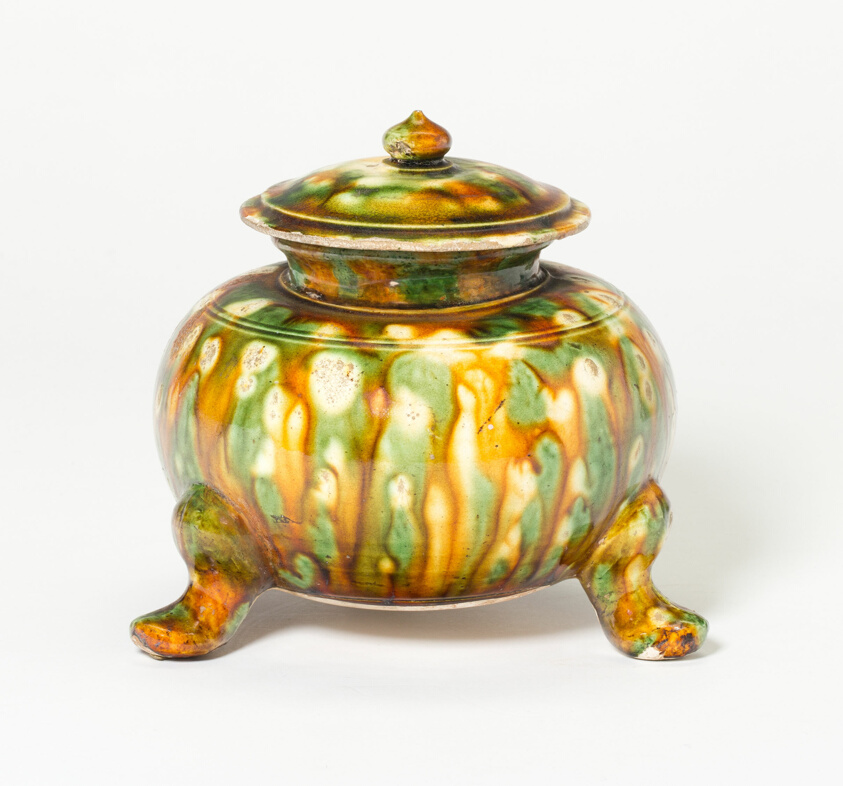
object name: Vessel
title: Covered Tripod Jar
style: Chinese (culture or style)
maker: China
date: Tang dynasty (618–907), first half of 8th century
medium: Earthenware with three-color (sancai) lead glazes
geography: China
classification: ceramics; asian art; vessel